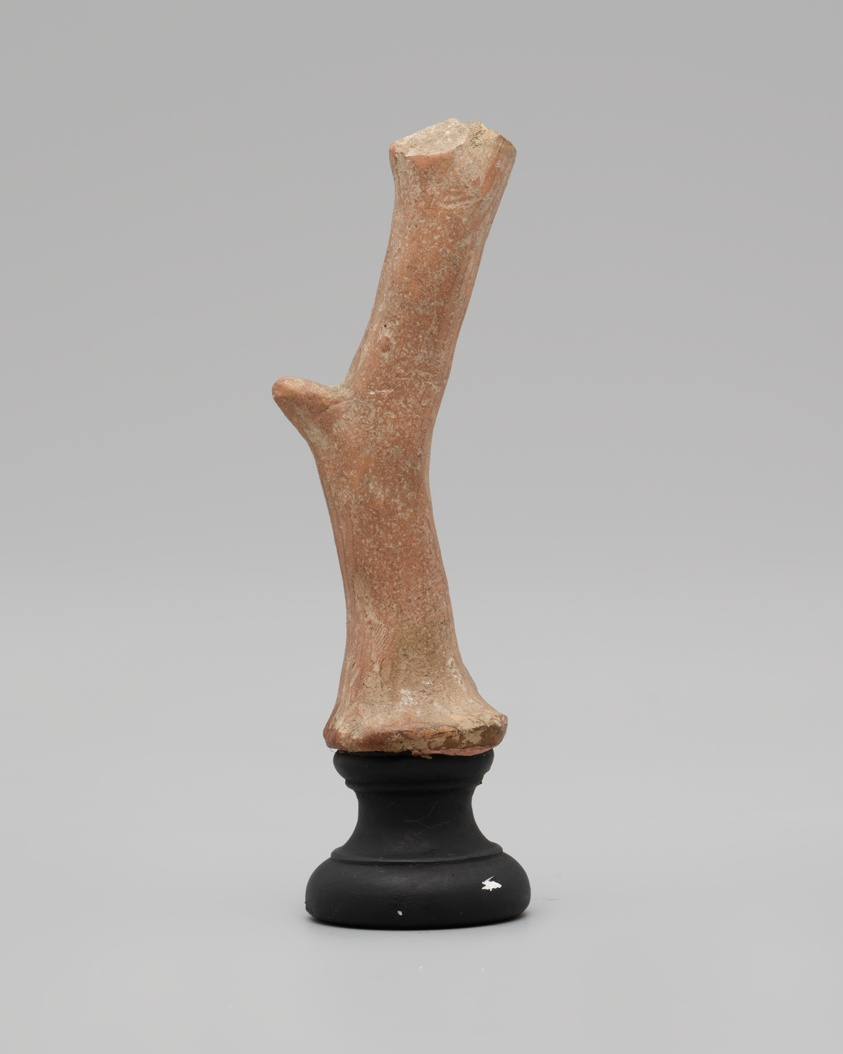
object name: Sculpture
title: Statuette of a Tree Trunk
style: greek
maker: Greek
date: 4th-3rd century BCE ?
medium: terracotta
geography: Greece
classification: earthenware; ceramics; sculpture; ancient art